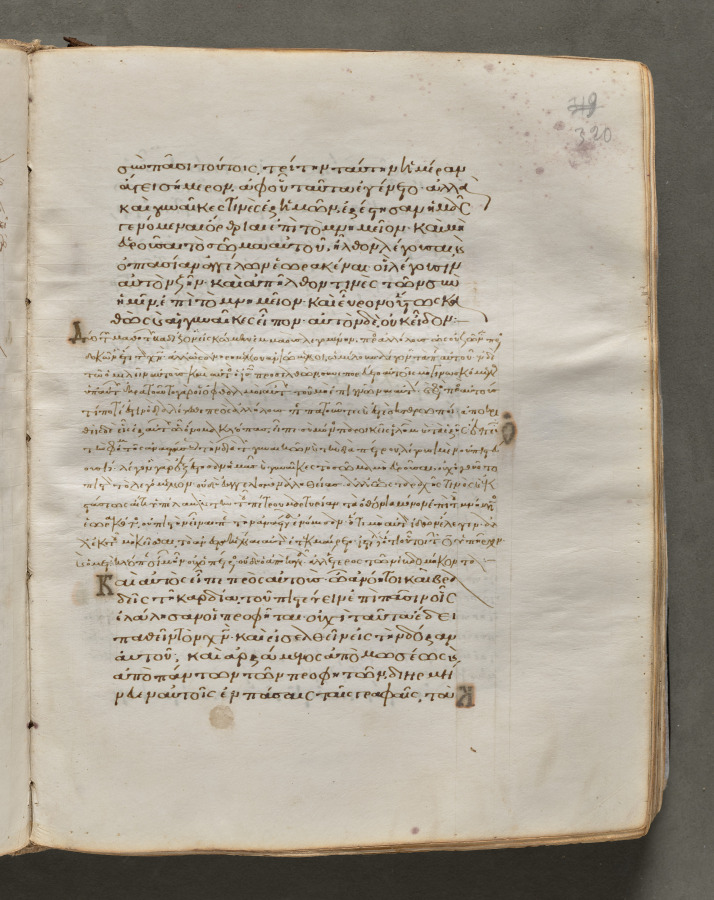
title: Text, folio 320 (recto), from a Gospel Book with Commentaries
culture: Byzantium, Constantinople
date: c. 1000–1100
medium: ink, tempera, and gold on vellum; leather binding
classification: Bound Volume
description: Each of the four gospels in this book opens on a page with brilliantly illuminated borders depicting the author of the text as well as birds—principally peacocks, symbols of the immortality of the soul—and fountains, representing the fountain of life and the salvation of the soul. This volume consists of 428 leaves with texts in Greek. Its level of sophistication suggests that it was probably written and decorated in a monastery in Constantinople.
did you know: Gospel books were carried in procession through Byzantine churches.